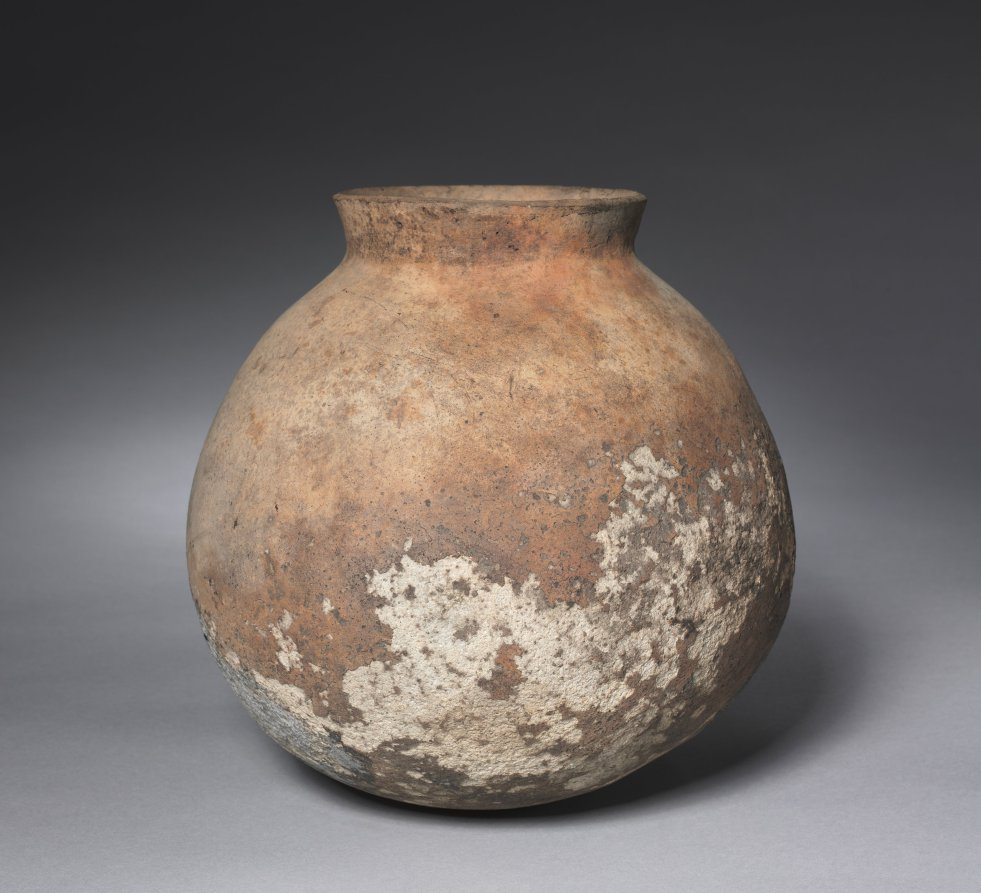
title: Short-necked Storage Jar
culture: Korea, Bronze Age (1000–300 BCE)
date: 600s–300s BCE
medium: earthenware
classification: Ceramic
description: A large quantity of pottery such as this earthenware jar was produced during the Bronze Age in Korea, as farming became more commonly practiced. Large jars made of fine clay were used to stored grains and later were buried in in tombs to accompany the tomb owner. It was during this time that a substantial number of Korean farmers migrated to the western Japanese archipelago and introduced advanced rice farming and pottery-making techniques.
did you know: A large quantity of clay pottery to store food such as this work excavated from ancient sites indicate the advanced development of agriculture in the Korean peninsula during the Bronze Age.